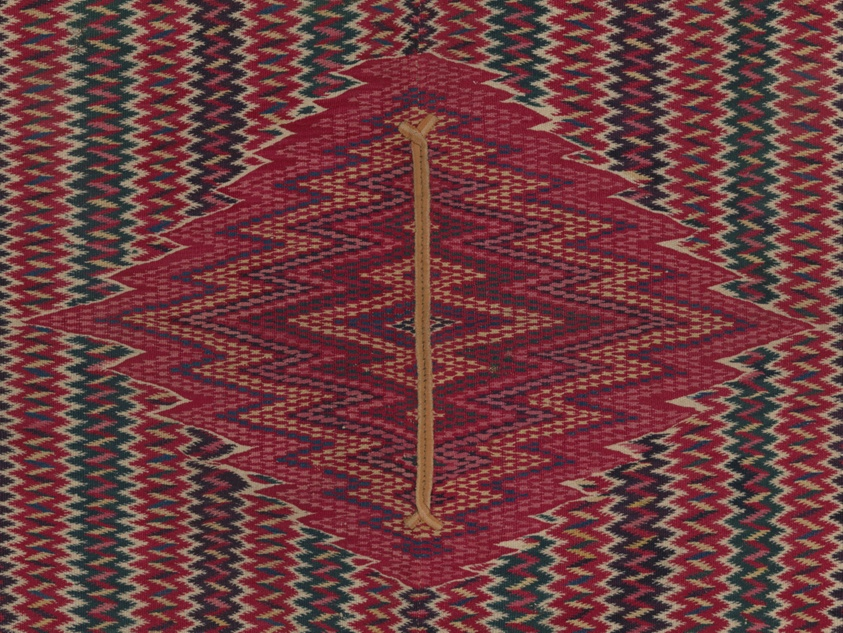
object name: Textile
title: Sarape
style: Folk Art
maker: Mexico, possibly Saltillo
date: 1750/1800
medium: Cotton and wool, single dovetail tapestry weave; neck edge tapes of cotton, plain weave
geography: Mexico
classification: textile; weaving